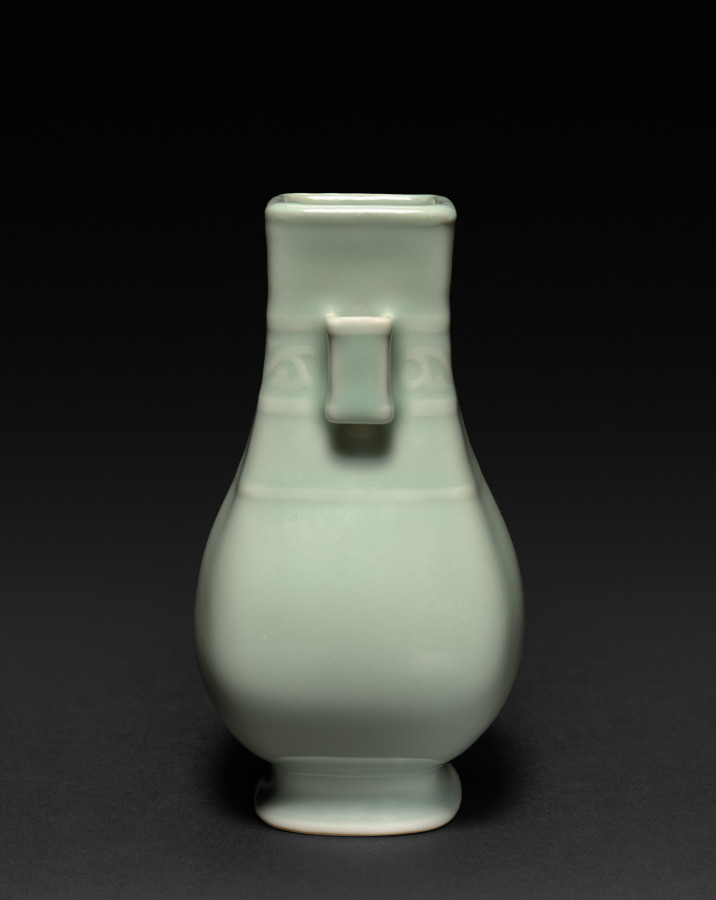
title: Vase in Form of Archaic Hu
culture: China, Jiangxi province, Jingdezhen kilns, Qing dynasty (1644-1911), Qianlong mark and reign (1736-95)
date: 1736–95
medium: porcelain with celadon glaze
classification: Ceramic